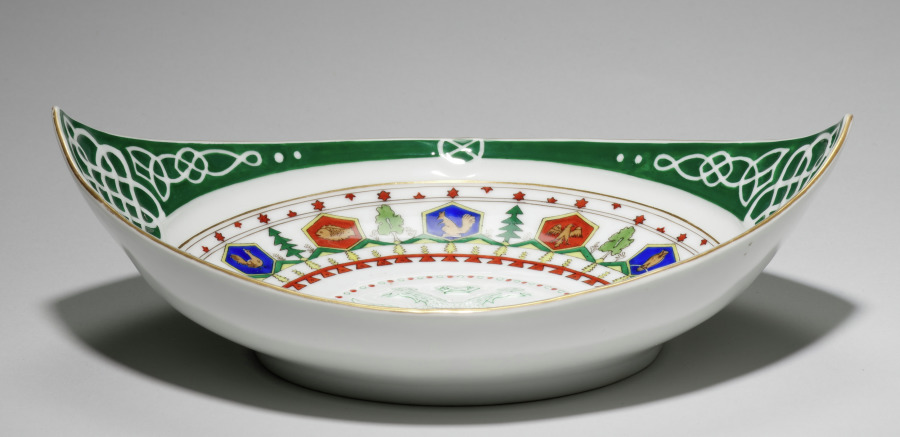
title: Bowl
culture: Russia, St. Petersburg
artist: Kornilov Brothers (Russian, established 1835)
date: between 1891–1917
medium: porcelain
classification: Ceramic